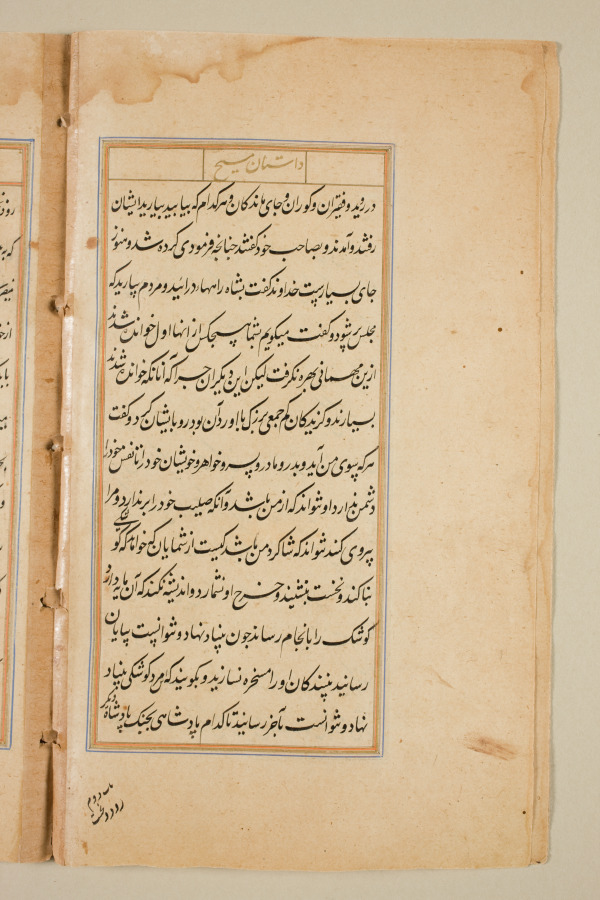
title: Text page from a Mirror of Holiness (Mir’at al-quds) of Father Jerome Xavier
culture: Mughal India, Allahabad, made for Prince Salim (1569–1627)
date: 1602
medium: Ink and gold on paper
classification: Manuscript